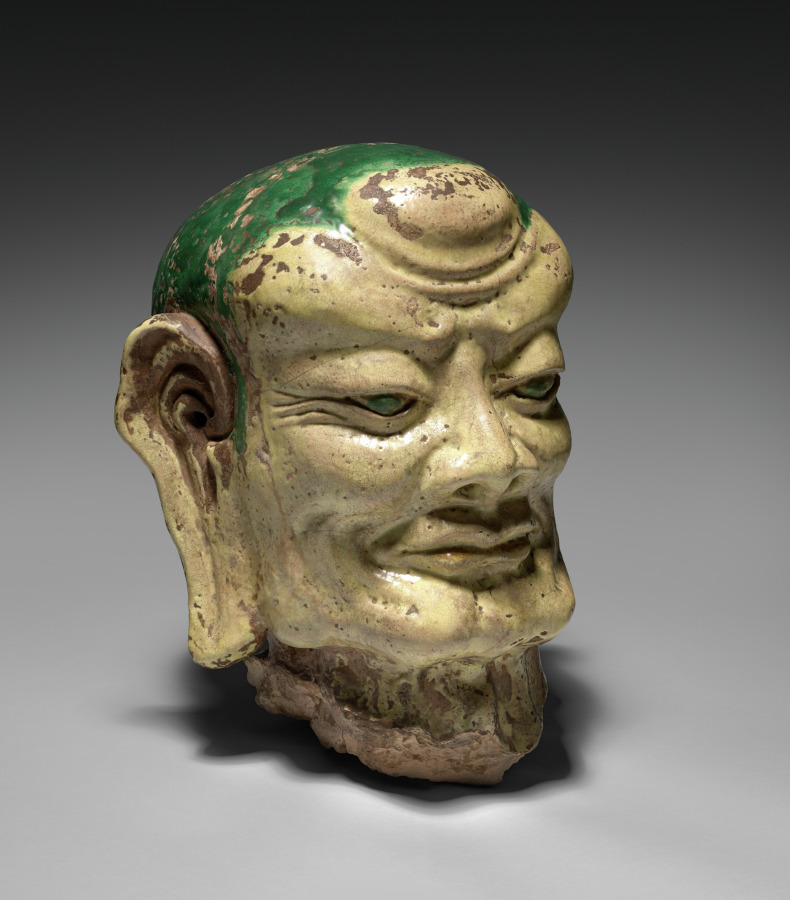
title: Head of a Lohan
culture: China, Ming dynasty (1368–1644)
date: 1368–1644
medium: earthenware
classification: Sculpture